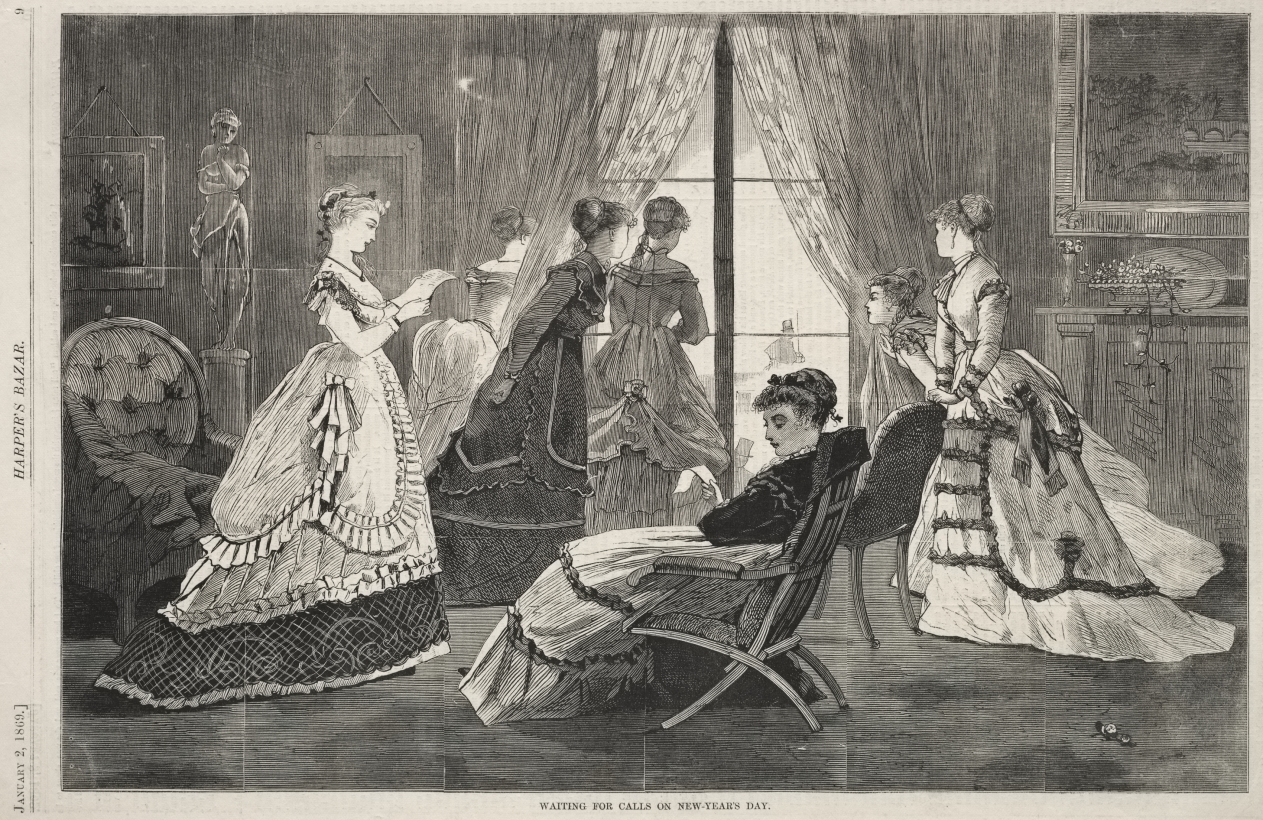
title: Waiting for Calls on New Year's Day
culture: America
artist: Winslow Homer (American, 1836–1910)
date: 1869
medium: wood engraving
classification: Print